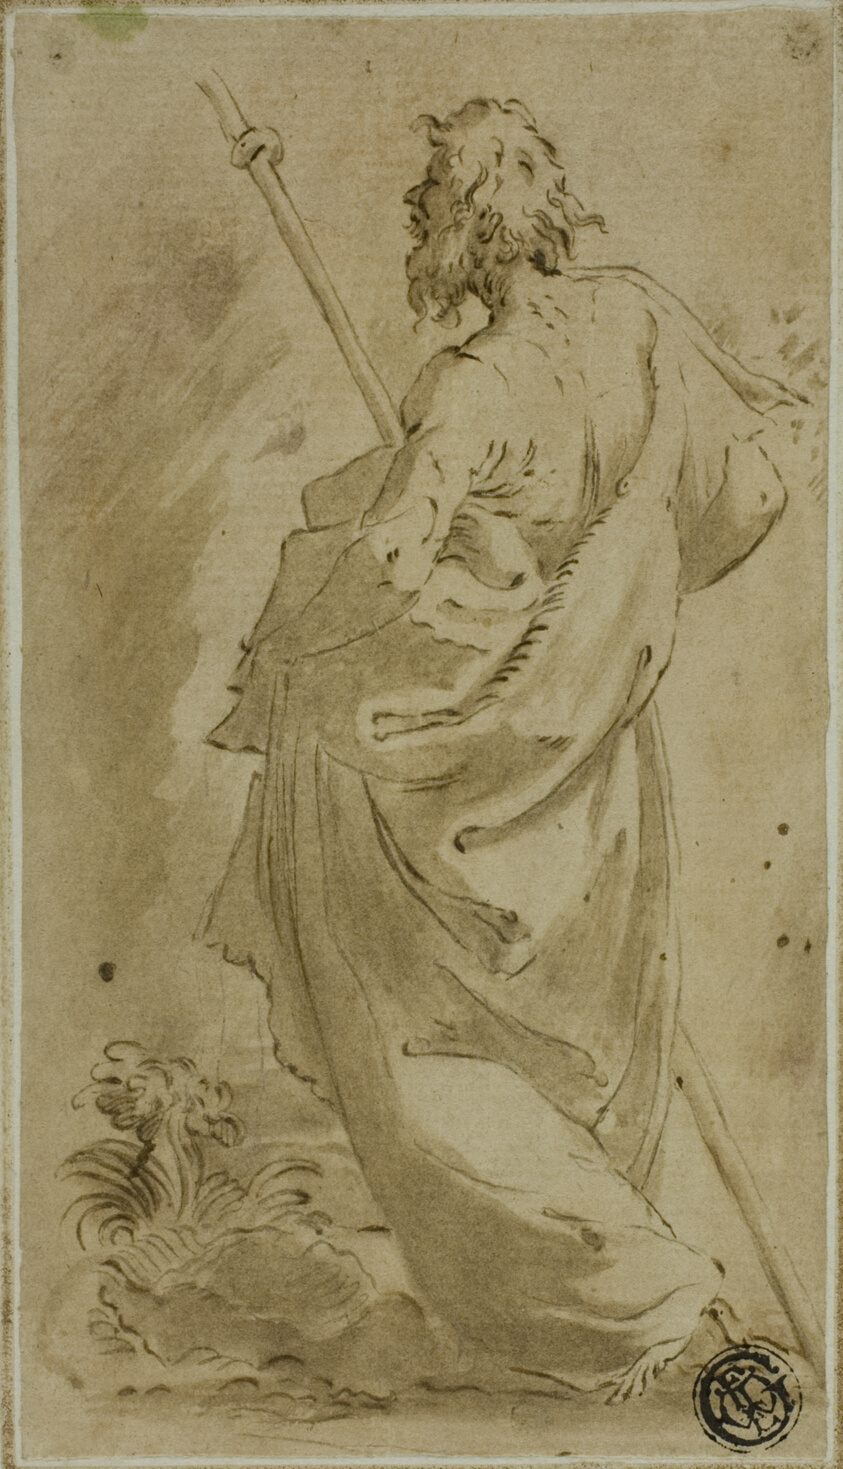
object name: Drawing and Watercolor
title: Saint James Major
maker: After Francesco Mazzola, called Parmigianino; Italian, 1503-1540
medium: Pen and brown ink, with brush and brown wash, over traces of graphite, on buff laid paper, laid down on ivory laid card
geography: Italy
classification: ink with wash; drawings (visual works); prints and drawing